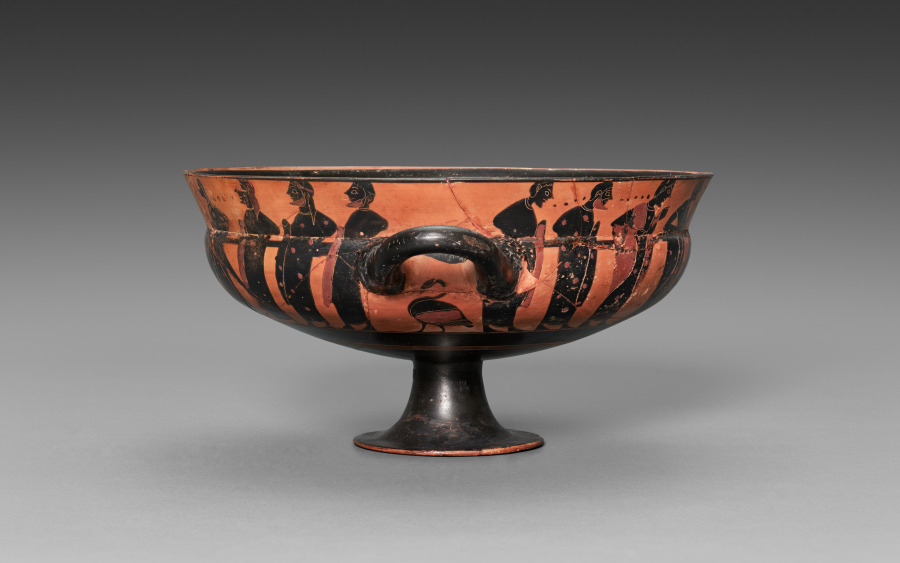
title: Siana Cup (Black-Figure Kylix [Drinking Cup]): Horseman and Warriors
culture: Greek, Attic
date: 575–550 BCE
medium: ceramic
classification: Ceramic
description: Two kneeling warriors do battle in the tondo of this large drinking cup, red blood streaming from their wounded legs. Without labels or attributes, their identities remain uncertain—perhaps Eteokles and Polyneikes, the cursed sons of Oedipus. The exterior figures are anonymous, although many are accompanied by small dots probably meant to imitate letters (for identifying inscriptions). On one side, a warrior is greeted by a nude youth holding a garland, with a horseman, a flying eagle, and several men observing. On the other, a bearded man rides a rearing horse, flanked by six draped men. Waterbirds stand beneath the handles.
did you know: Siana cups take their name from a cemetery in Rhodes where many were first found.